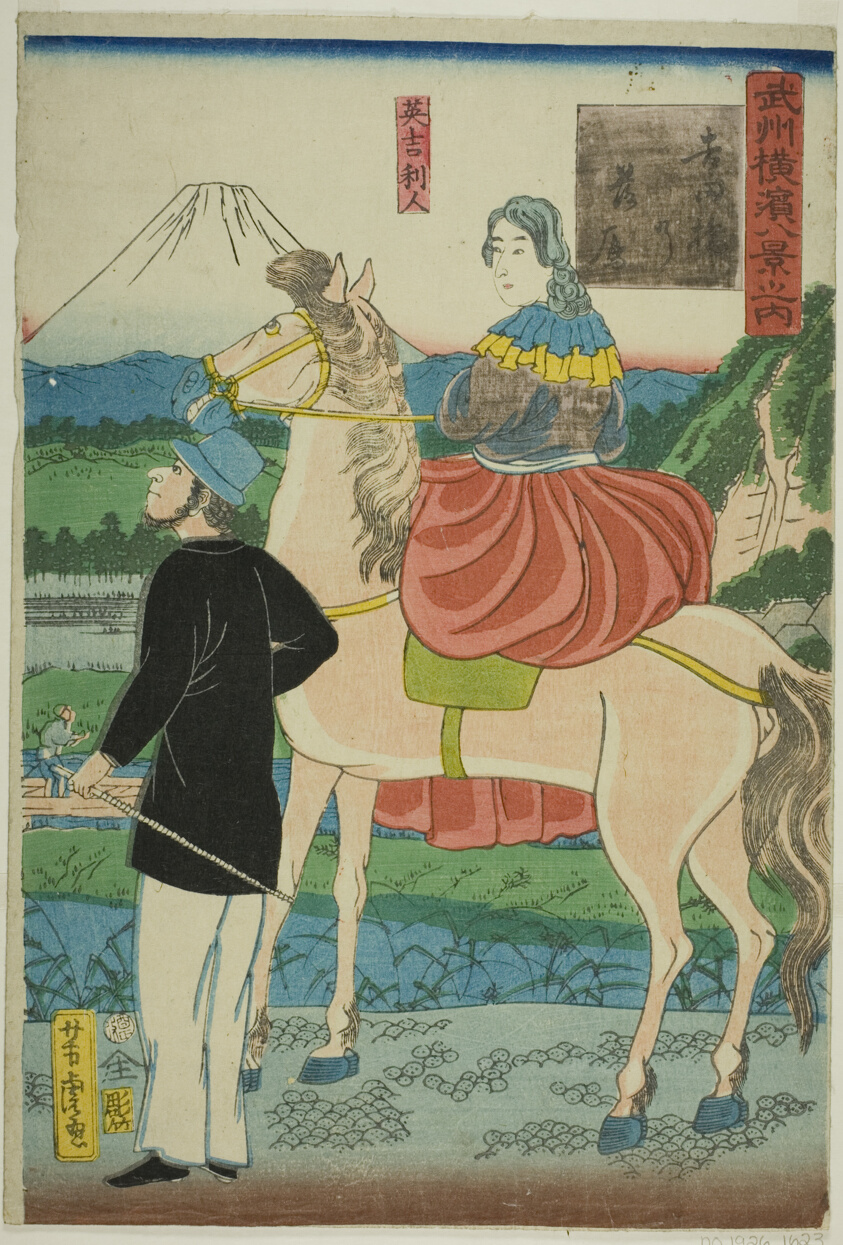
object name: Print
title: English Watching Descending Geese at Yoshida Bridge (Yoshida-bashi no rakugan, Igirisujin) , from the series "Eight Views of Yokohama in Musashino Province (Bushu Yokohama hakkei no uchi)"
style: Japanese (culture or style)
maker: Utagawa Yoshitora (Japanese, active c. 1836-87)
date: 1861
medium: Color woodblock print; oban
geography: Japan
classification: woodblock print; print; asian art